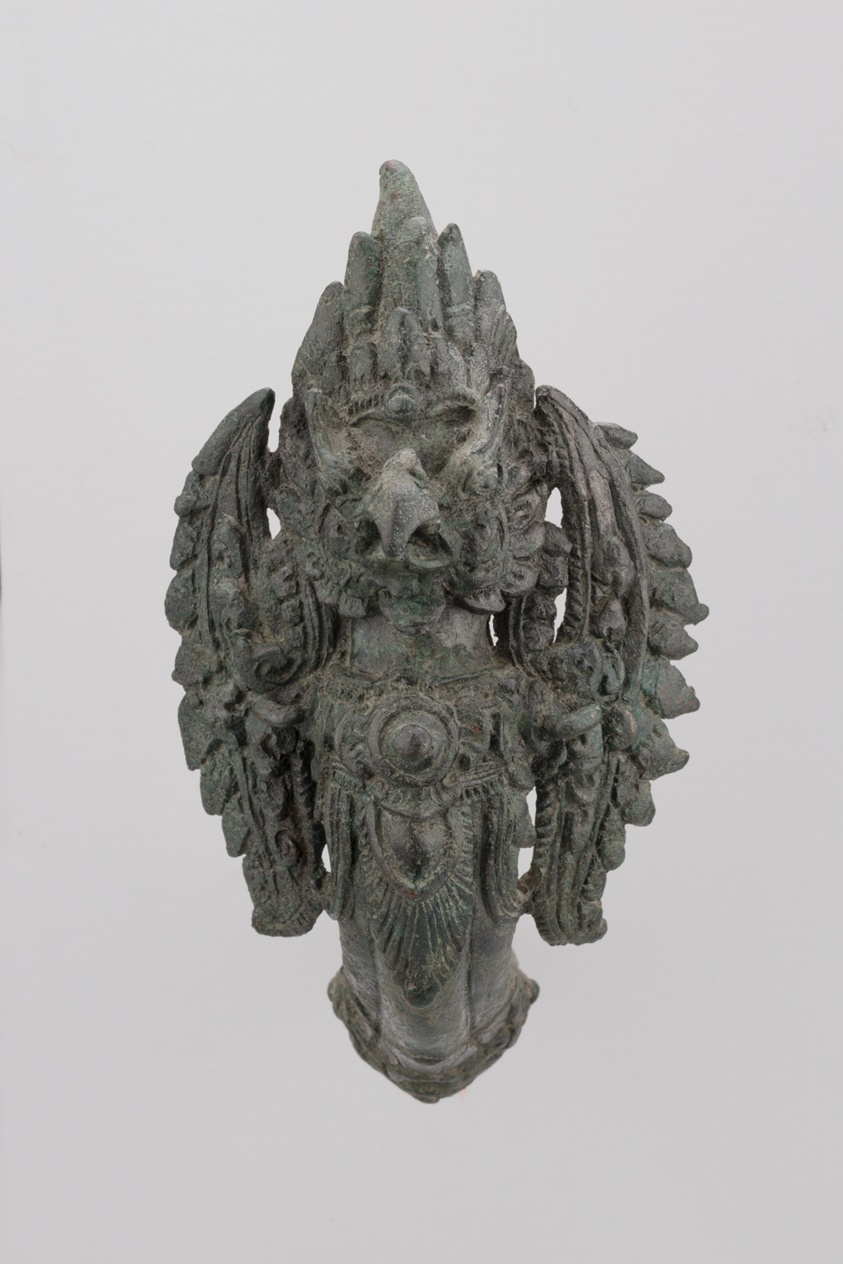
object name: Architectural fragment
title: Garuda Finial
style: Southeast Asian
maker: Cambodia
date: Angkor period, 12th/13th century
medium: Bronze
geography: Cambodia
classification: bronze; metal; decorative object/ornament; asian art; architectural fragment